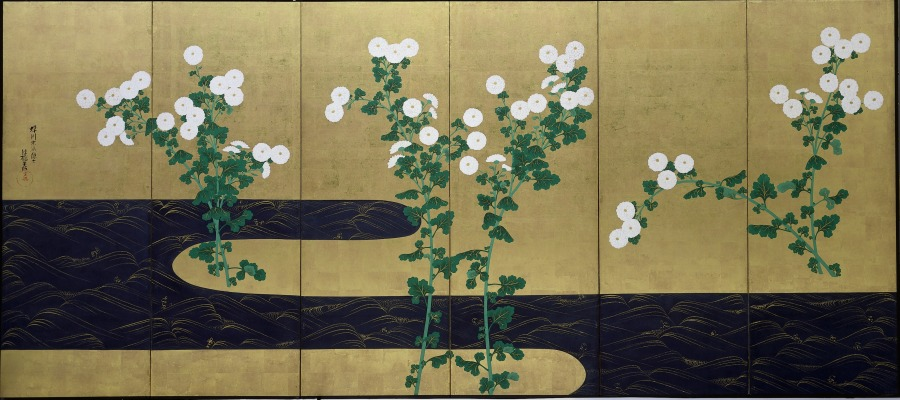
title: Chrysanthemums by a Stream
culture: Japan, Edo period (1615–1868)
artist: possibly by Ogata Kōrin (Japanese, 1658–1716)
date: c. 1715–30 or later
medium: Pair of six-panel folding screens; ink and color on gilded paper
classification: Painting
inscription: 蝉川末派隠士 法橋光琳 方祝（朱丸印）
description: These screens recall a painting style so closely identified with Ogata Kōrin (1658–1716) that it is called Rinpa, or “Rin School,” after the ideograph “rin” in his name. The highly stylized background accentuates floral groupings that have been groomed so as to appear utterly artificial, like the synthetic arrangements available today. Kōrin's genius derived in large measure from natural phenomena painstakingly observed and then manipulated to create compositions of startling refinement and sparkling isolation. This process may have grown out of Kōrin's early immersion in the family textile business, a medium that encourages such dramatic distillations of form: the stream's gold-crested waves bring to mind traditional kimono robe designs of Kōrin's era. Works with the signature seen on this painting, including a style name, or persona suggested to Kōrin by his brother Kenzan (1663–1743), are sometimes considered to have been produced either in the last year of his life, when he was very ill, or after his death. In both scenarios, the lion’s share of the work would have been done by studio assistants, but little is truly known of his studio practice. Given the regularity of the gold waves on the stream, and the tension in the arrangement of the chrysanthemums, it is also possible that the screens were made in emulation of Kōrin's designs by a later artist.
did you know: The signature used on these screens can perhaps indicate paintings made in the last year of the artist's life, or works completed by his studio after his death.